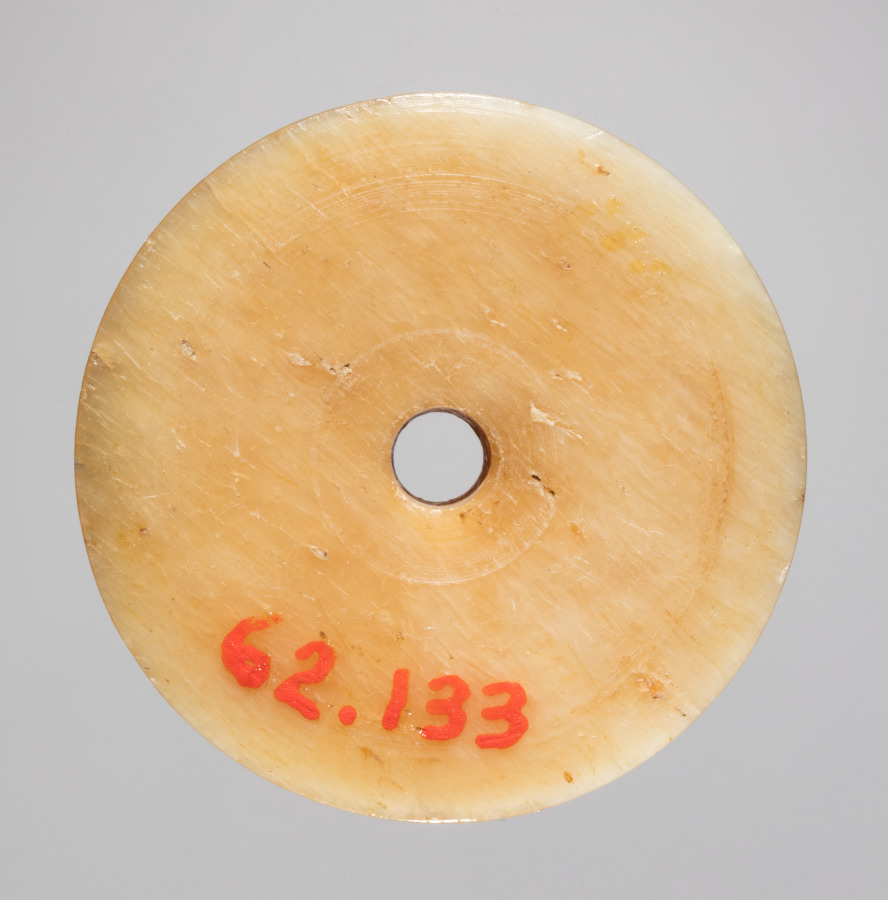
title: Spindle Whorl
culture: Iran, early Islamic period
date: 700s - 900s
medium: bone, incised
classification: Spindle Whorl